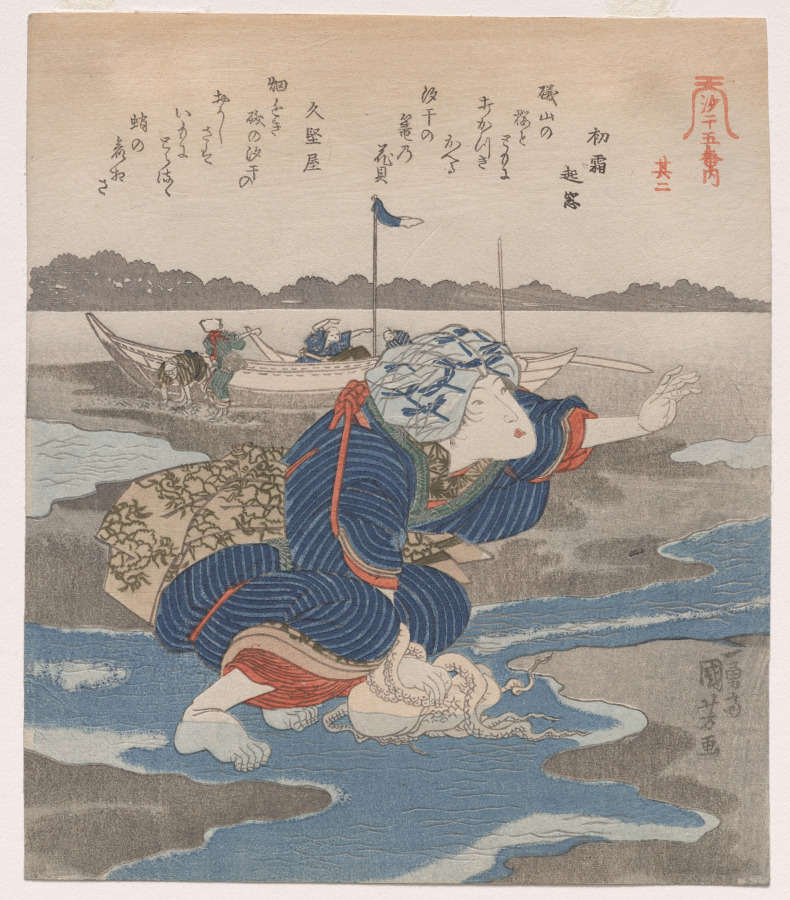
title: Second Print from A Low Tide Pentaptych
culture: Japan, Edo period (1615–1868)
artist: Utagawa Kuniyoshi (Japanese, 1797–1861)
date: c. 1830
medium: color woodblock print from a pentaptych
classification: Print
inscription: Signature: Ichiyusai Kuniyoshi ga.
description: This is one of five surimono, privately commissioned prints, making up an image of people collecting sea life at low tide. Ten witty poems, written by members of a poetry circle, appear across the upper part of the composition, with two poems on each print. Based in Edo (now Tokyo), the group was led by Hisakataya Misora (active 1810s–30s), who wrote four of the poems. This composition may have been printed in April, which was considered the best time for beachcombing.